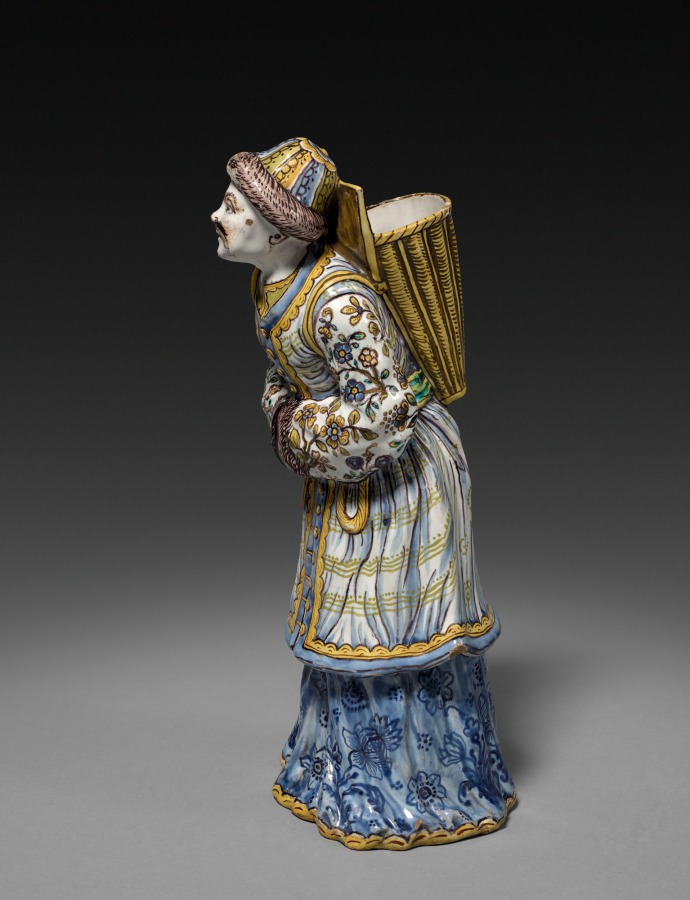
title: Figure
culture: France, Strasbourg, 18th century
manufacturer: Strasbourg Factory (France)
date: 1745–50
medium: faience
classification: Ceramic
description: For several decades in the middle of the 18th century the Hannong family were proprietors of one of the best and most influential French faience factories at Strasbourg. Here German and French ceramic styles and techniques met and were fused. These figures were copied from a pair executed in Chantilly porcelain which in turn relied on a Meissen prototype.